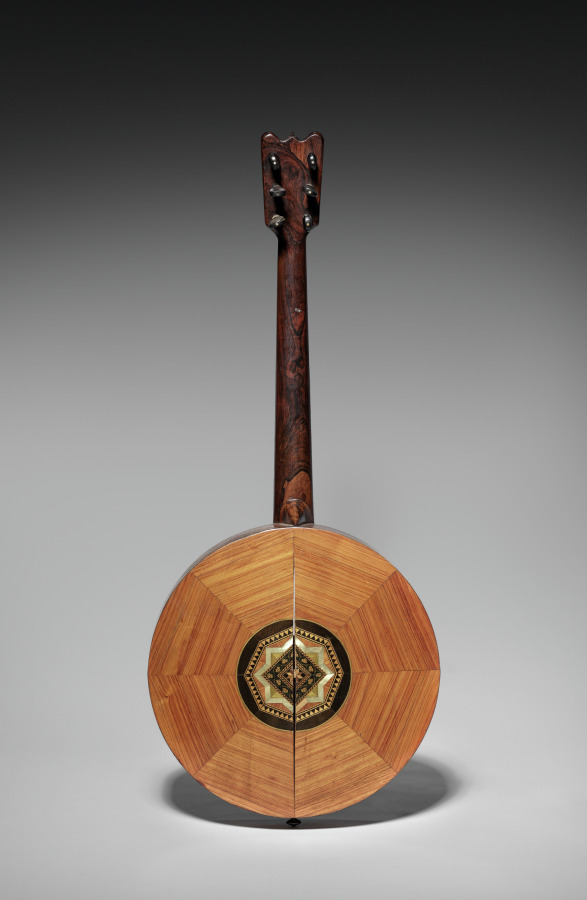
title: Guitar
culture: Italy, 19th century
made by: probably by Fernando Theze (Italian)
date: c. 1860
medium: wood, ebonized wood, mother of pearl inlay, resin, bone?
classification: Musical Instrument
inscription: label inside reads: "Faite a Turin par F. Theze--Amateur."